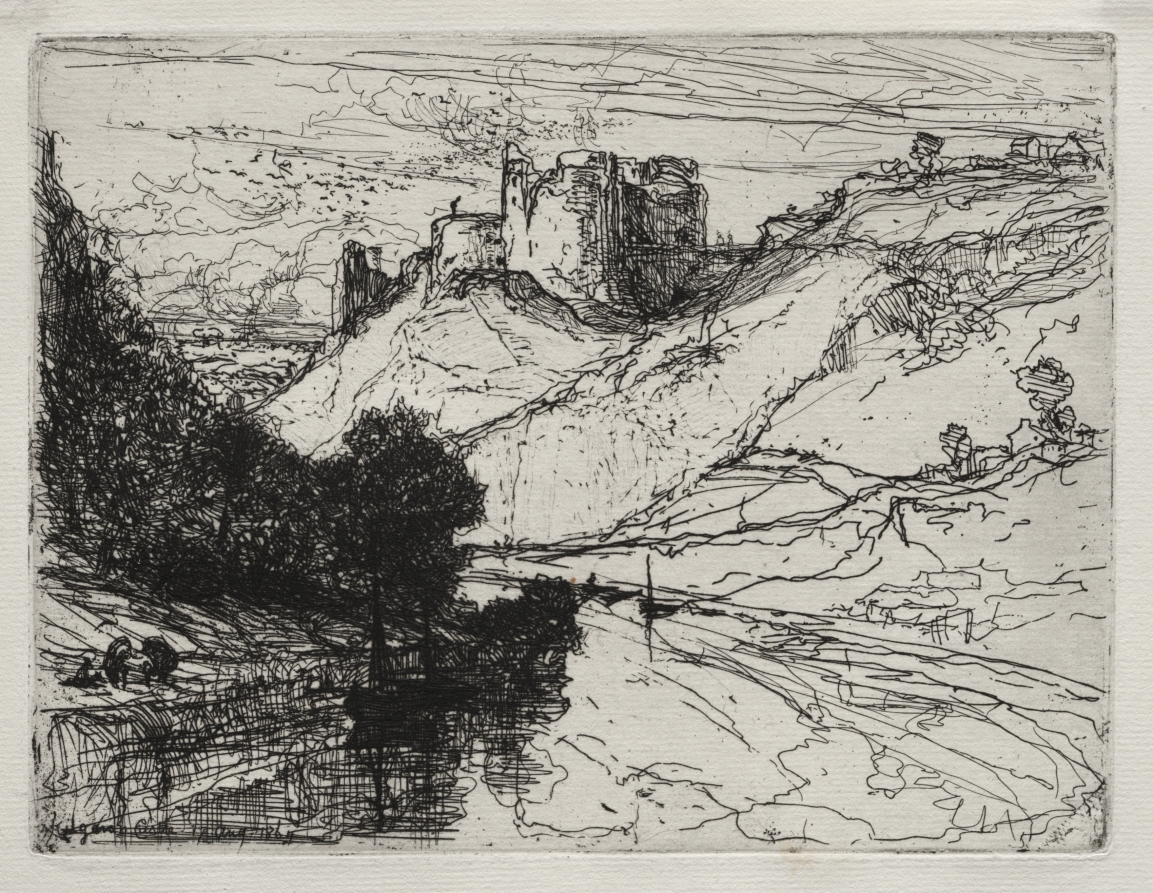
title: Kilgaren Castle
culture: England, 19th century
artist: Francis Seymour Haden (British, 1818–1910)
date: 1864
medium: etching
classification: Print